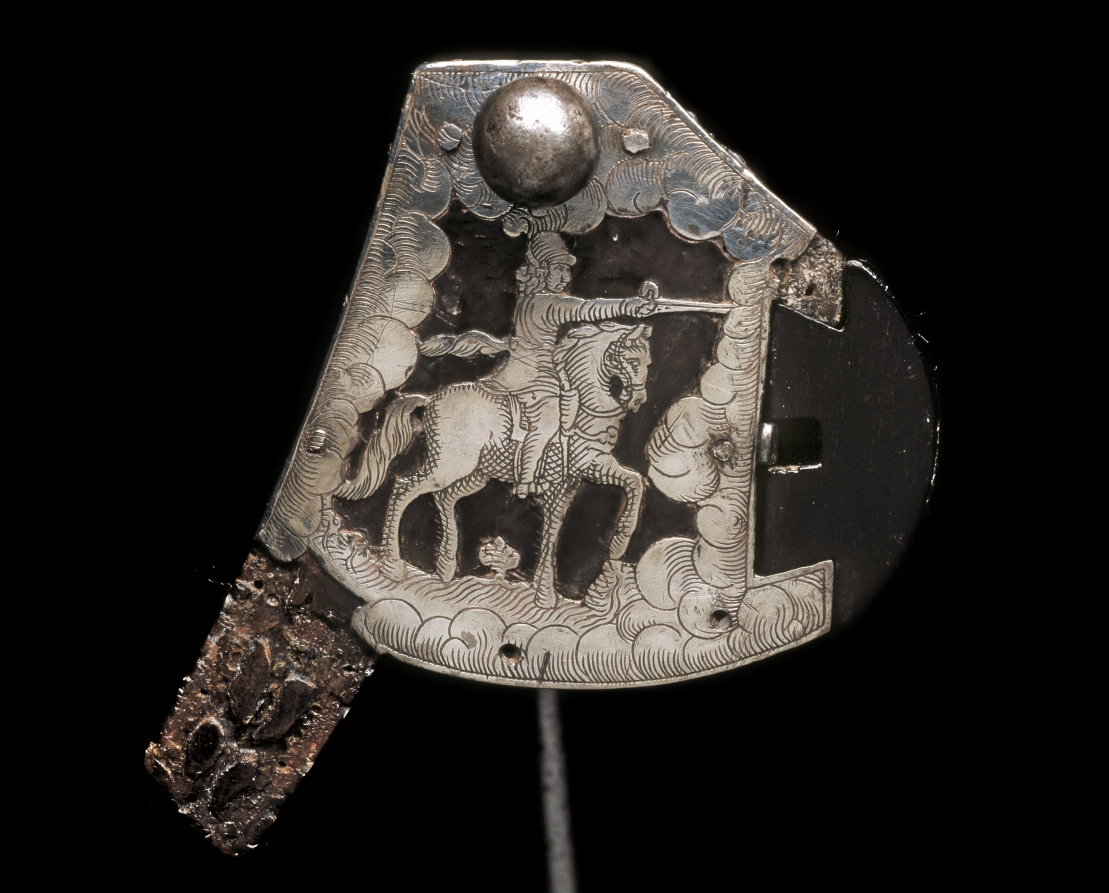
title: Wheel-Lock Hunting Rifle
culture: Austria, Ferlach, mid 17th Century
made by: Hans Schmidt (Austrian, 1669)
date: mid-1600s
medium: steel, varnished wood (walnut) stock decorated with inlaid silver wire and appliqués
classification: Arms and Armor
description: The barrel of this hunting piece is marked with the letters "GS" within a shield, the likely initials of the owner, who was probably a member of the Order of the Golden Fleece as indicated by the escutcheon on the stock.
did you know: A similar rifle made for another member of the Order of the Golden Fleece, Graf Sigmund von Dietrichstein, is preserved in Vienna.